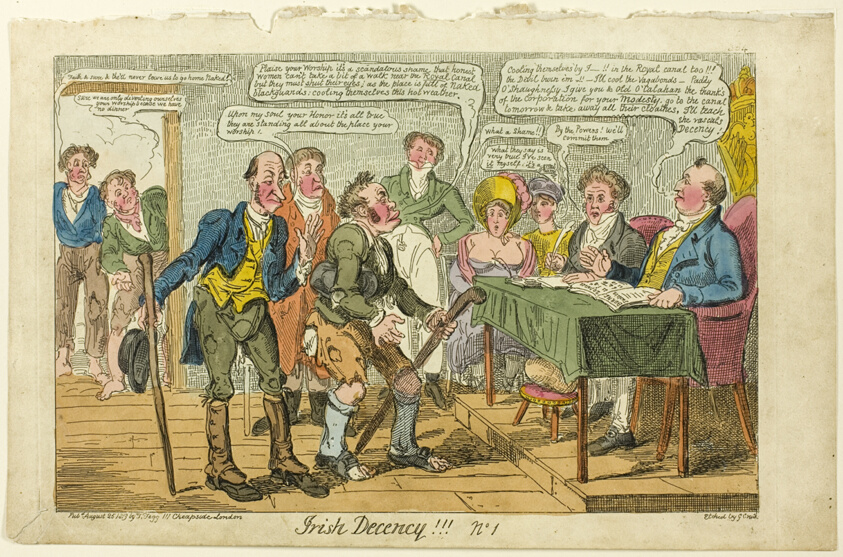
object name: Print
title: Irish Decency ! ! ! no. 1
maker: George Cruikshank (English, 1792-1878); published by Thomas Tegg (English 1776-1846)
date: published August 25, 1819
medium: Etching with hand-coloring on wove paper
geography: England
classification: etching; print; prints and drawing